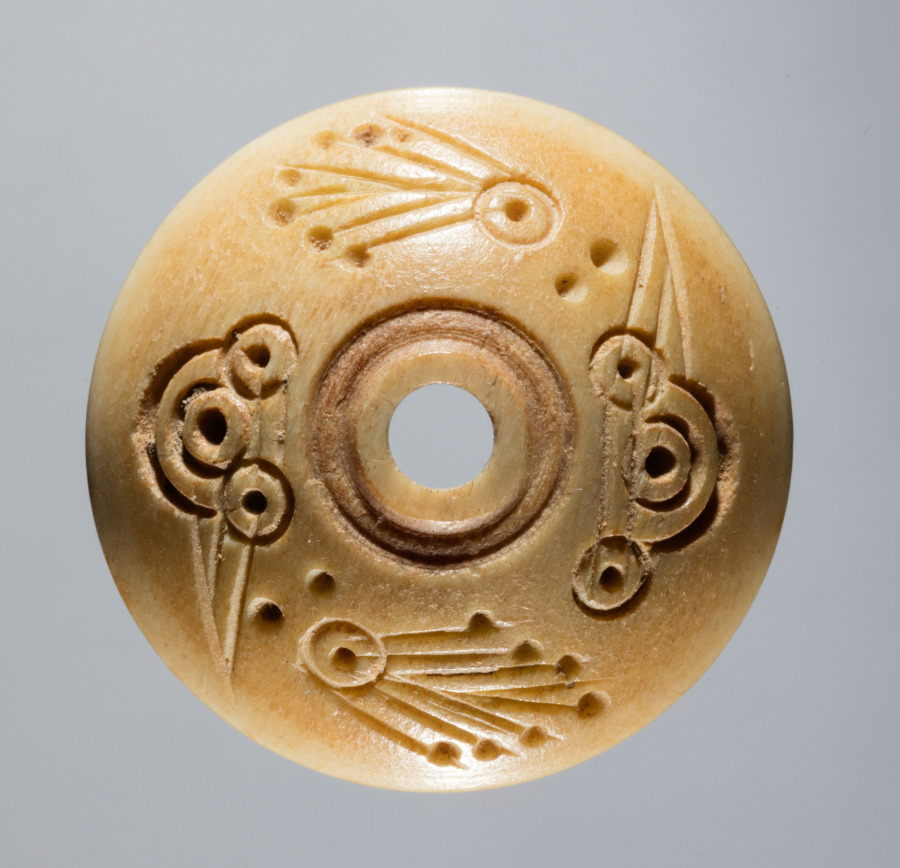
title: Spindle Whorl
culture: Iran, early Islamic period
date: 700s - 900s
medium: bone, incised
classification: Spindle Whorl